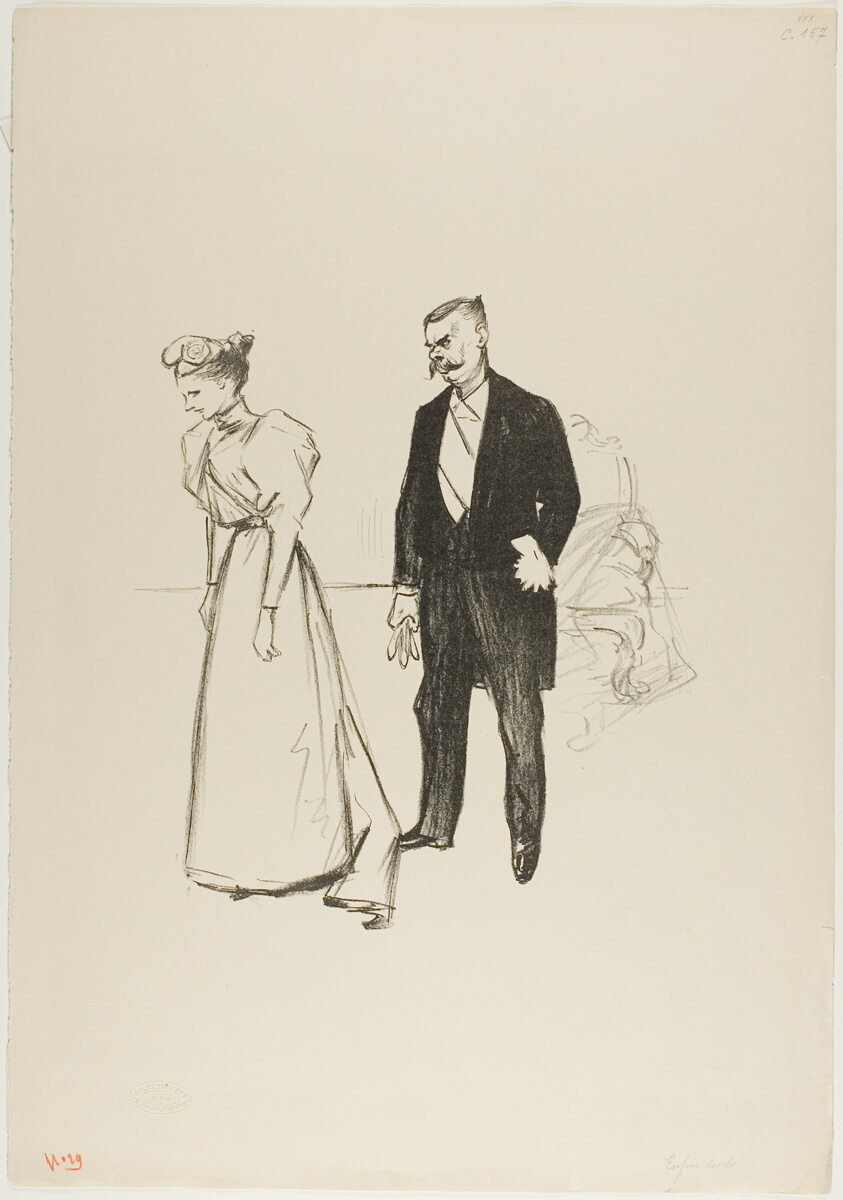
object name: Print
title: Alone at last!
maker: Théophile-Alexandre Steinlen; French, born Switzerland, 1859-1923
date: July 1894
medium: Lithograph in black on cream wove paper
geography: France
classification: lithograph; print; prints and drawing